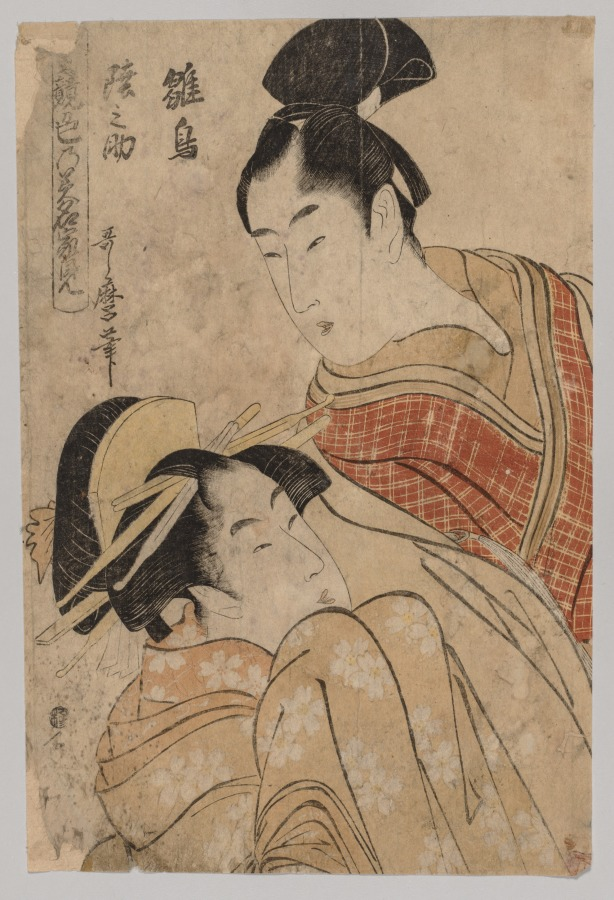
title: Making Love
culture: Japan, Edo period (1615–1868)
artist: Kitagawa Utamaro (Japanese, c. 1754–1806)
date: 1753–1806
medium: color woodblock print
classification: Print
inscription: Signature: Utamaro fude